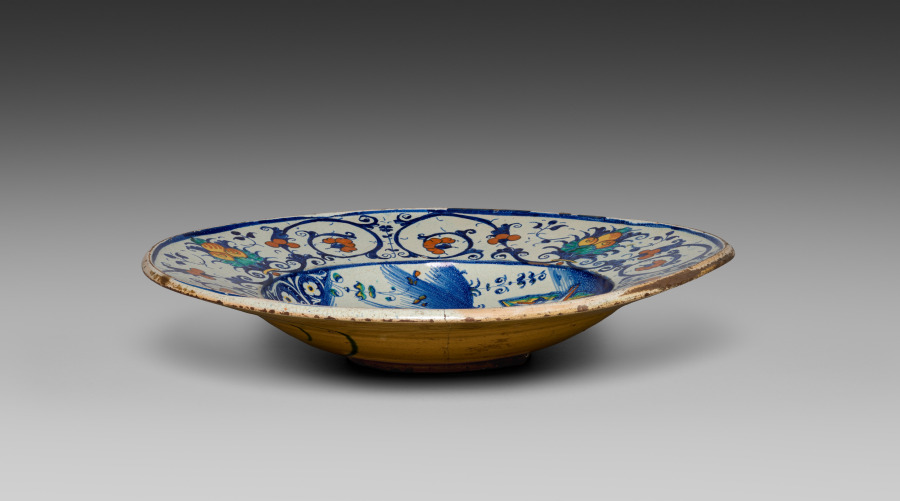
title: Bowl Depicting Saint Francis Receiving Stigmata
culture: Italy, Deruta, 16th century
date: 1531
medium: tin-glazed earthenware (maiolica)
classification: Ceramic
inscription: dated on reverse: "1531"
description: In this depiction representing his closeness to Christ, Saint Francis receives the stigmata through strikes of light from a vision of the risen Lord hovering as an angel in front of the basilica at Assisi. This bowl likely recalls a panel painting produced by the Italian master painter Giotto around 1300.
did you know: According to Christian tradition, the stigmata correspond to the appearance of Christ’s wounds at similar places on the faithful following his crucifixion.